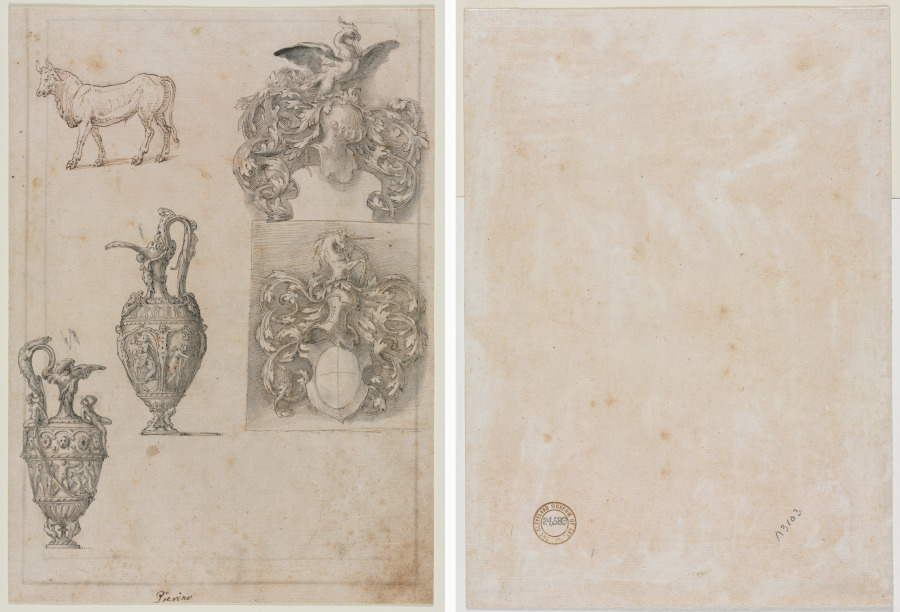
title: Design for Two Vases, Two Coats of Arms, and a Bull (recto) Several Line Borders (verso)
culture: Italy, 16th century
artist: Luzio Romano (Italian, active 1528–75)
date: mid 1500s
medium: pen and brown ink and brush and gray and brown wash over black chalk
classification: Drawing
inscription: lower center, in brown ink: Pierino ; VERSO OF SECONDARY SUPPORT, lower right, in graphite: A3103